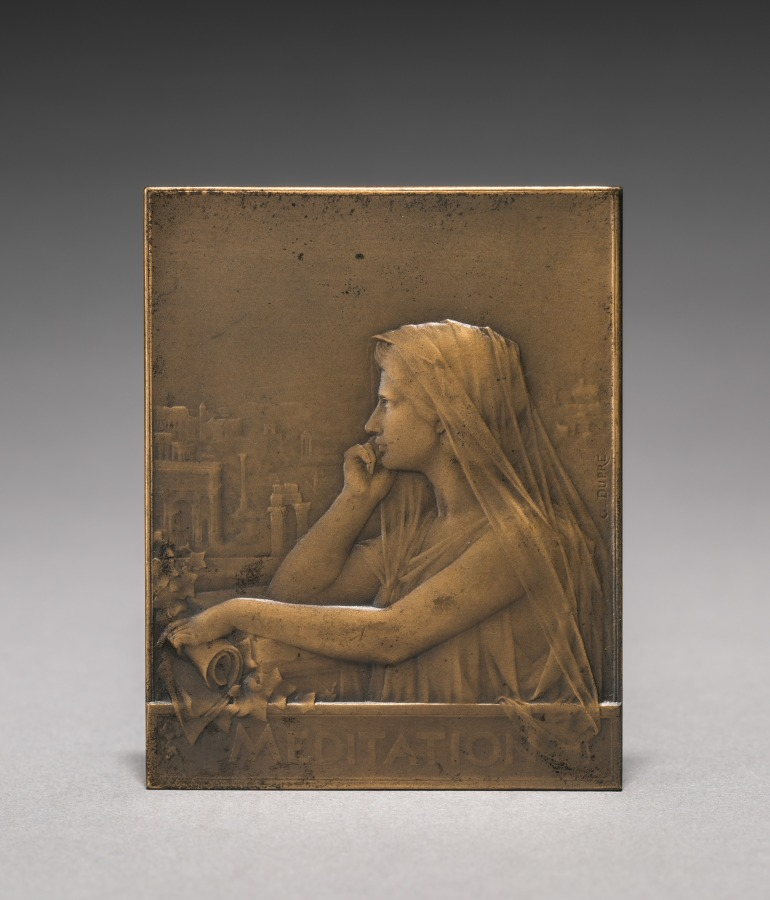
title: Medallion (obverse)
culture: France, 19th-20th century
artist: Jules Dupré (French, 1811–1889)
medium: bronze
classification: Metalwork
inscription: "Meditation"; signed: "G. Dupré."